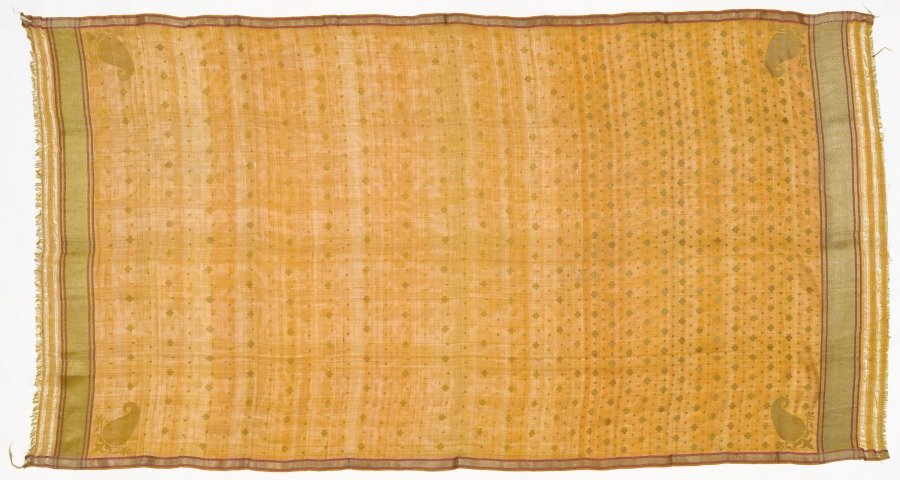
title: Sari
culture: India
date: 1900–1950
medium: brocade; silk and metal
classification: Textile